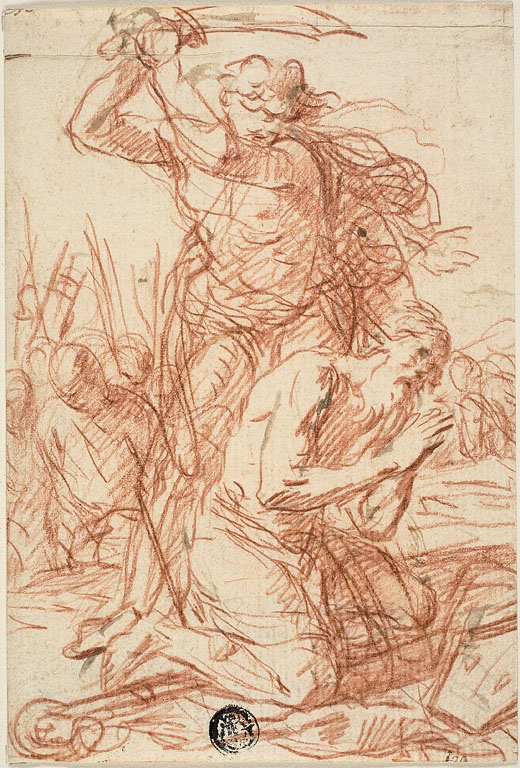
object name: Drawing and Watercolor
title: Martyrdom of Bishop Saint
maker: Ercole Procaccini, the Younger (Italian, before 1520-1595); or Simone Cantarini (Italian, 1612-1648)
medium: Red chalk, with touches of brush and brown wash, on ivory laid paper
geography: Italy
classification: chalk; drawings (visual works); prints and drawing